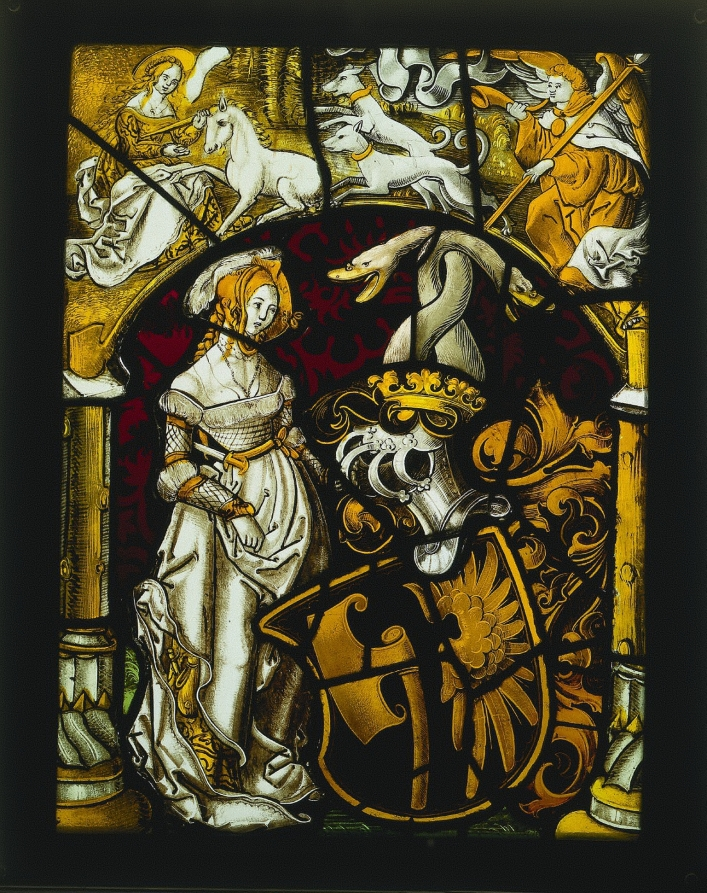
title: Heraldic Panel with Arms of Lichtenfels and a Unicorn Hunt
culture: Germany or Switzerland, 16th century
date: c. 1515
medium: white glass with silver stain and pot metal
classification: Glass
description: The upper half of this panel shows a unicorn hunt reconfigured to represent the annunciation. Only a virgin could lure a unicorn who is seen here grasping the horn of the mythical beast; not far behind are the hunter and hounds. The Virgin here is the Virgin Mary and arriving to the scene is the angel Gabriel dressed as a hunter.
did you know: The red glass is actually layered over clear glass. Otherwise, it would be too dark to see through.